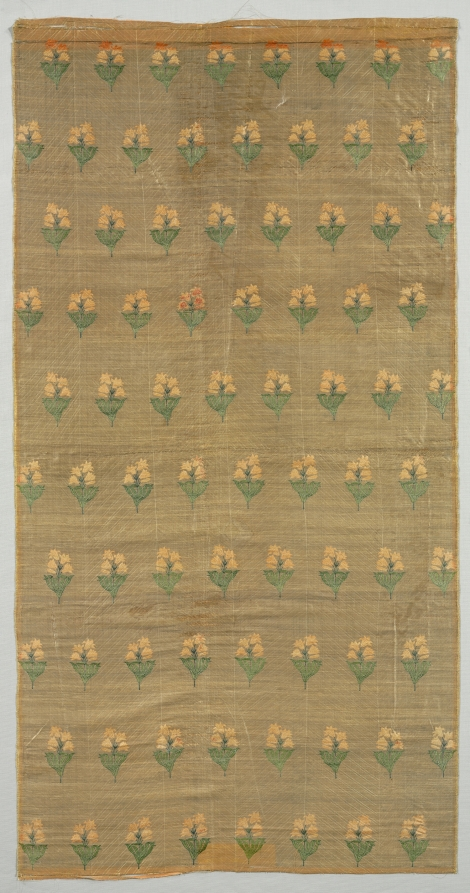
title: Fragment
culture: Iran, 17th century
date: 1600s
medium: brocade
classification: Textile